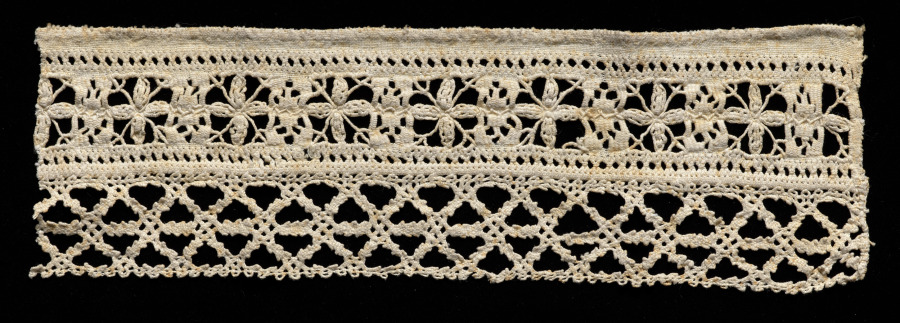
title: Lace fragment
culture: Italy, Venice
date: 1500s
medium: Linen: needle lace (drawnwork) insertion and bobbin lace edging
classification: Lace